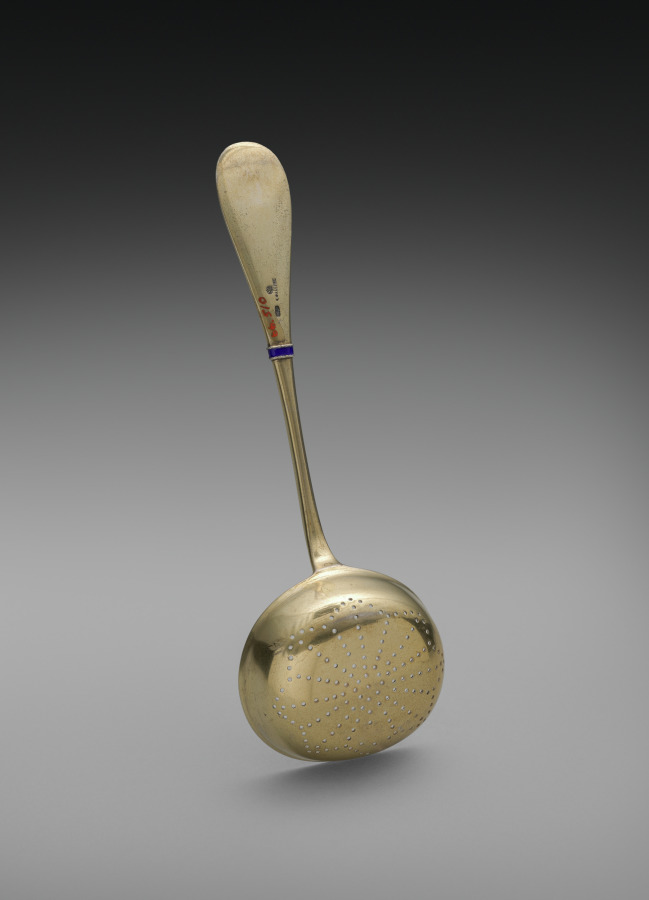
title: Tea Strainer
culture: Russia, St. Petersburg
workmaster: attributed to Feodor Ivanovich Rückert (Russian, 1840–1917)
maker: House of Fabergé (Russian, 1842–1918)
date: 1887–96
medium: silver gilt, opaque cloisonné enamel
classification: Miscellaneous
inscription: 84, St. George? [assay mark for Moscow, 1882-1896]; C. Fabergé (in Cyrillic); double-headed eagle [imperial warrant]; 11494 scratched.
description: Fabergé’s craftsmen in Moscow, especially under the watchful eye of workmaster Feodor Rückert, became known for their work in the pan-Slavic or neo-Russian style, hearkening back to 17th-century motifs of Russian folk art. Often on rather conventional shapes, Rückert and his silversmiths created an explosion of color, achieved through the historic technique of cloisonné enamel in which tiny metal lines are soldered to the surface then filled with glass powders in various colors and fired to create a high gloss finish. The result is a spectacular evocation of the 17th-century originals. Far from mere copies, however, Rückert's designs, such as this tea service, employ naturalistic or abstract motifs in a thoroughly modern adaptation of a remarkable earlier period of Russian art and decoration.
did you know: This tea strainer is part of a larger tea service.